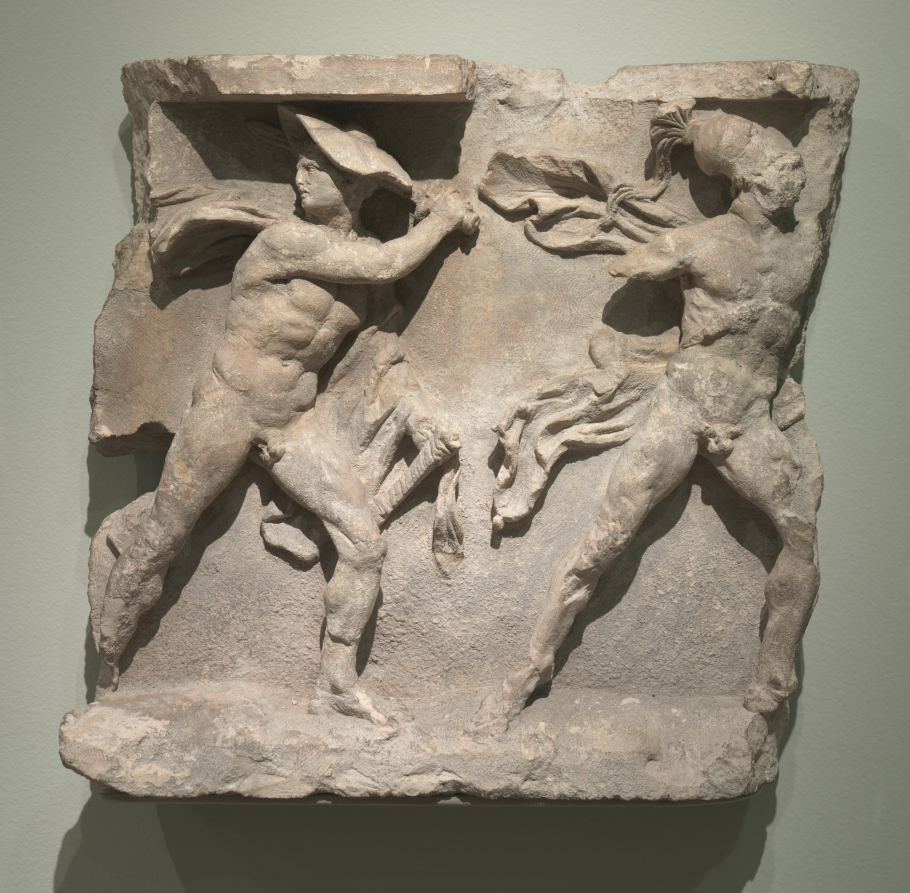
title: Relief of Striding Warriors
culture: Greek/South Italian, Taranto (ancient Taras)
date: 300–200 BCE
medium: limestone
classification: Sculpture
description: This carved limestone relief depicts two warriors striding to the right, one wearing a broad traveler's hat called a petasos and the other a Corinthian helmet. Each wears a short cloak called a chlamys over his left arm (now missing on the righthand warrior). The left warrior looks back, perhaps toward a horseman, since a small fragment of a horse’s foreleg remains behind his knee. The strong diagonals of the warriors contrasted with the flowing drapery of their cloaks demonstrates a dynamism characteristic of Hellenistic relief sculpture.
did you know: This relief was likely part of a larger frieze that decorated a naiskos, or small temple, above a grave.